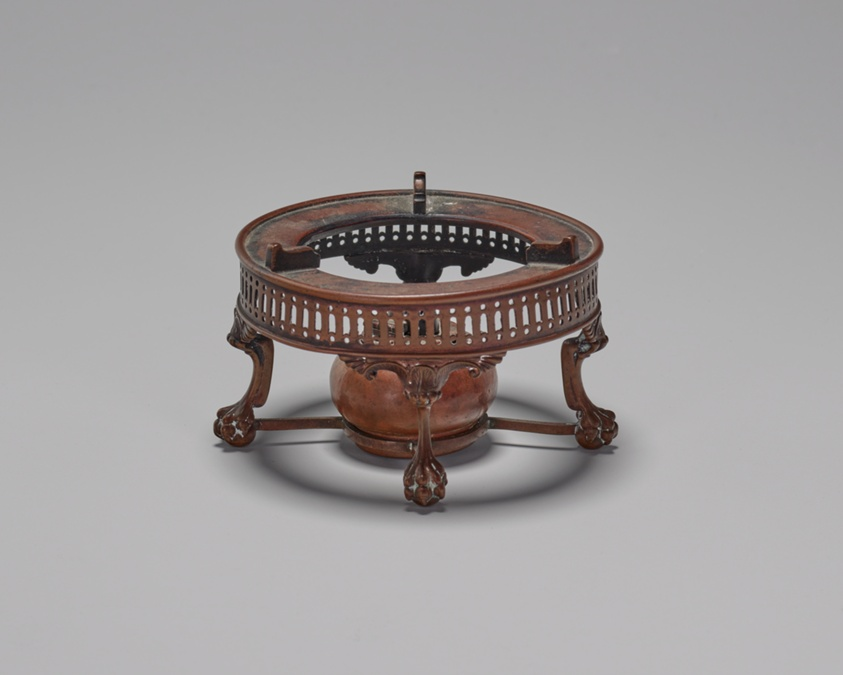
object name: Decorative Arts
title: Tea Kettle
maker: Gorham Manufacturing Company (American, founded 1831); Providence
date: c. 1900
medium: Copper, mixed metals, and wood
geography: Providence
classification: american decorative arts; decorative arts